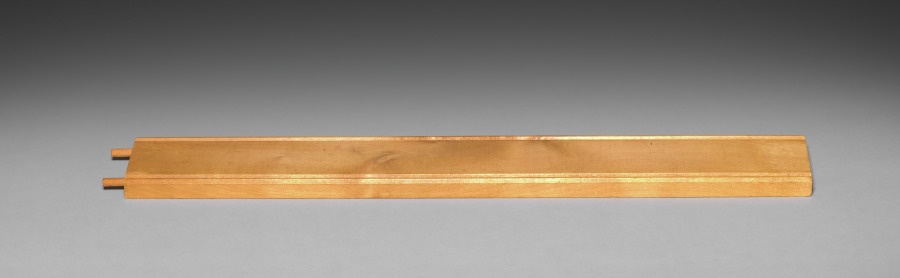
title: Train Track Section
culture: Denmark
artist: Boysen Toys (Danish)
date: 1900s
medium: wood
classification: Wood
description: Credit line: John D. Rockefeller General Education Board Grant II